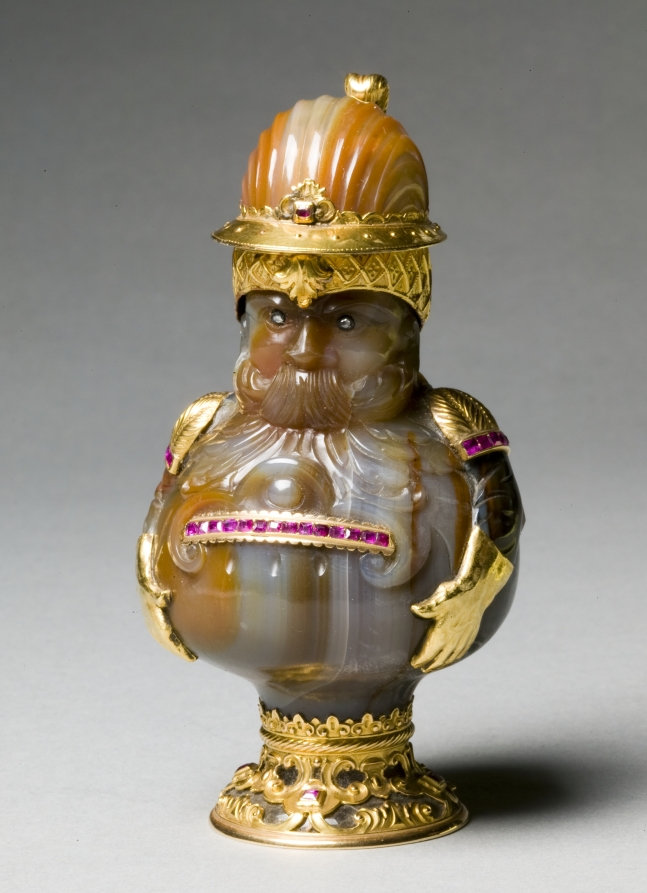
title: Figure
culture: Germany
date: c. 1740–60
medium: hardstone ewer agate with diamonds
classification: Miscellaneous